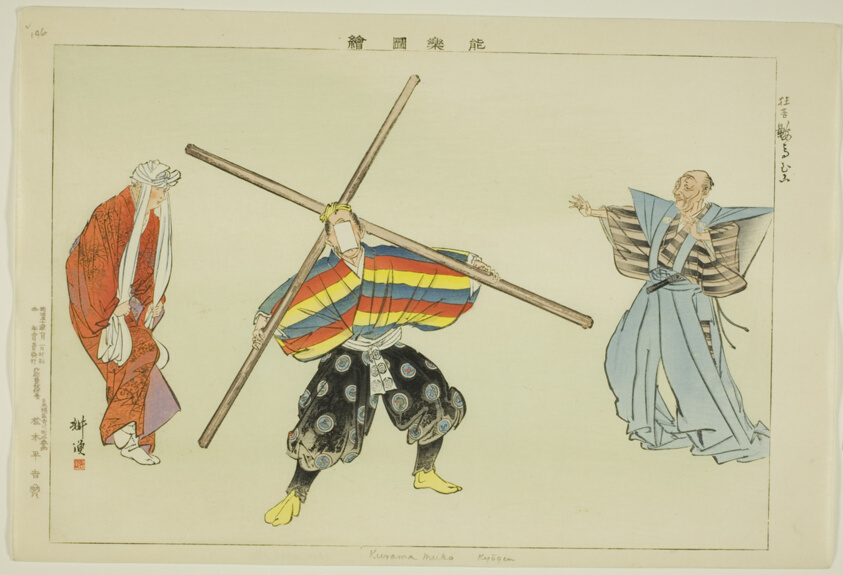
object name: Print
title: Kurama muko (Kyogen), from the series "Pictures of No Performances (Nogaku Zue)"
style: Japanese (culture or style)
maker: Tsukioka Kogyo; Japanese, 1869-1927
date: 1898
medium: Color woodblock print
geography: Japan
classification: woodblock print; print; asian art